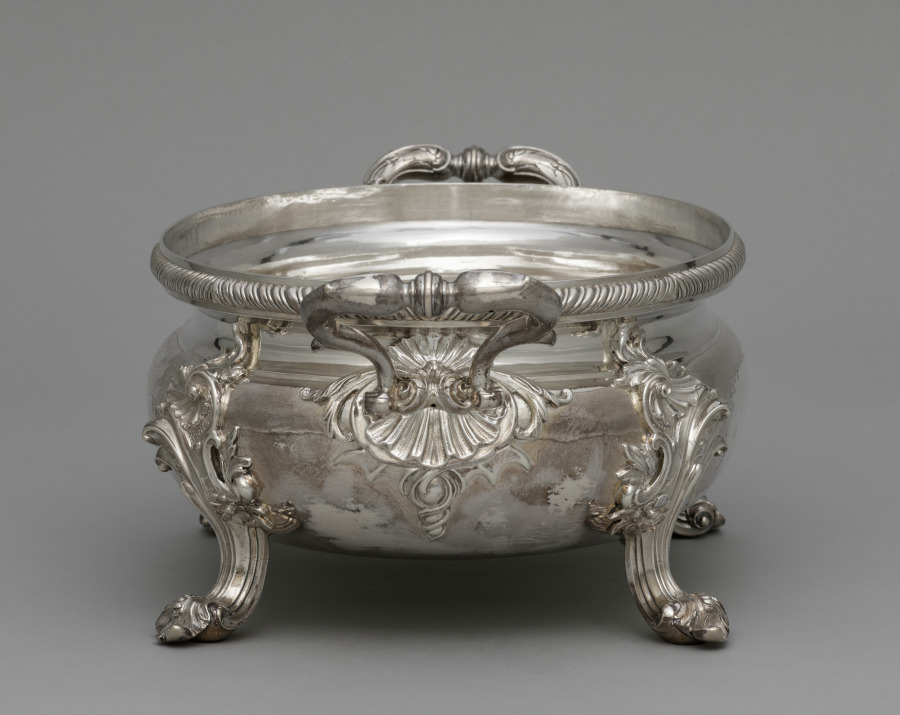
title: Tureen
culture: England, 18th century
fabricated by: Edward Wakelin (British, 1784)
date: 1753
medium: silver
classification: Silver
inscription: engraved coat of arms of Admiral Edward Vernon of Nacton (1684-1757) and his wife Sarah, daughter of Thomas Best. Engraved on cover is Vernon crest, a woman holding a scythe.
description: A very successful silversmith, Edward Wakelin may have been more a businessman than a craftsman or designer.